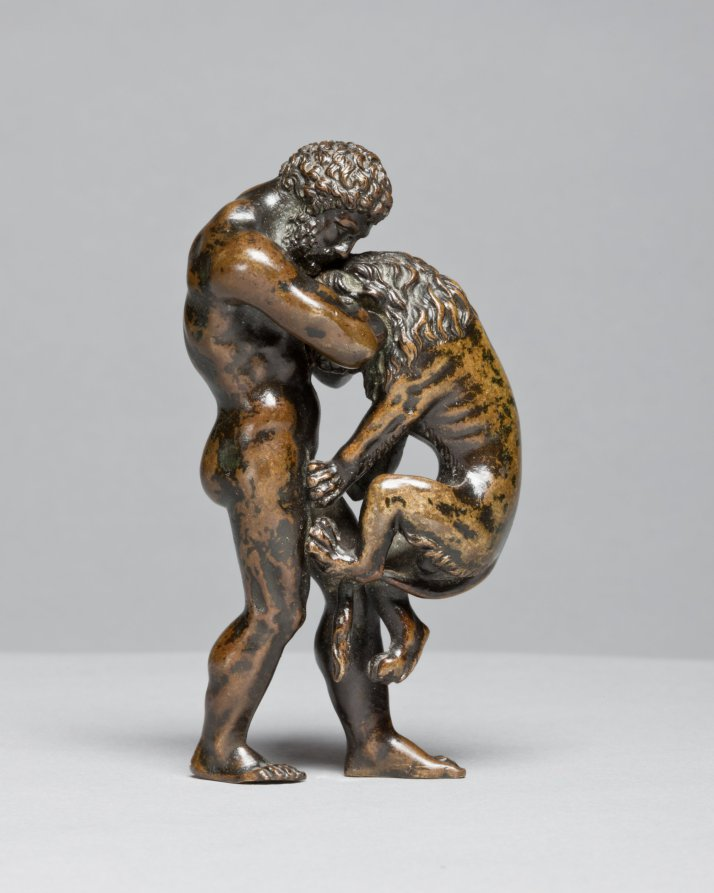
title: Hercules and the Nemean Lion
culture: Italy or France, 16th century or later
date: 1500s or later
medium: bronze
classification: Sculpture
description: The original owner of this work would have understood that this scene referred to the entire story of Hercules, the demi-god who had to accomplish twelve labors. The lion is named after the city of Nemea, near Corinth, a monstrous beast sent by the goddess Hera to wreak havoc on the area. After killing the lion, Hercules wore his pelt, commonly seen in other representations of the hero.